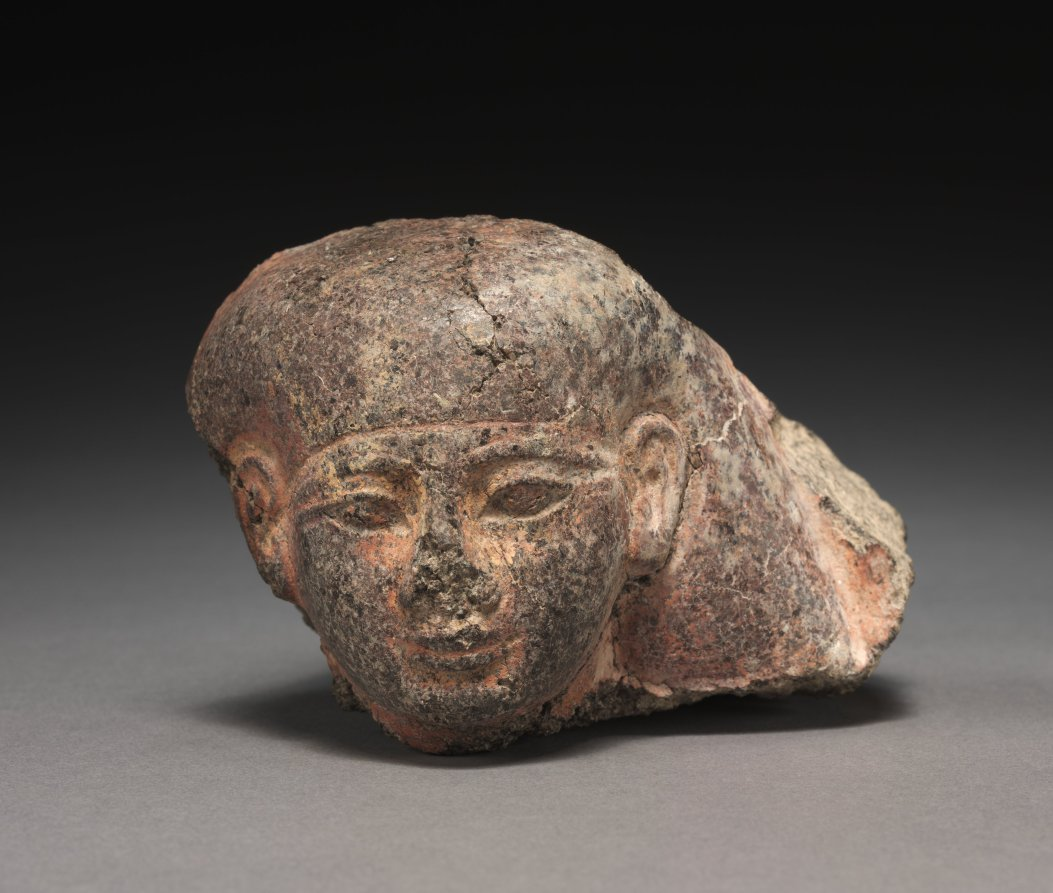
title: Male Head, perhaps from a Pair Statue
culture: Egypt, New Kingdom (1540–1069 BCE), Dynasty 18, reign of Amenhotep II (1425–1400 BCE)–reign of Tuthmosis IV (1400–1390 BCE)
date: 1401–1391 BCE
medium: gray granite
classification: Sculpture